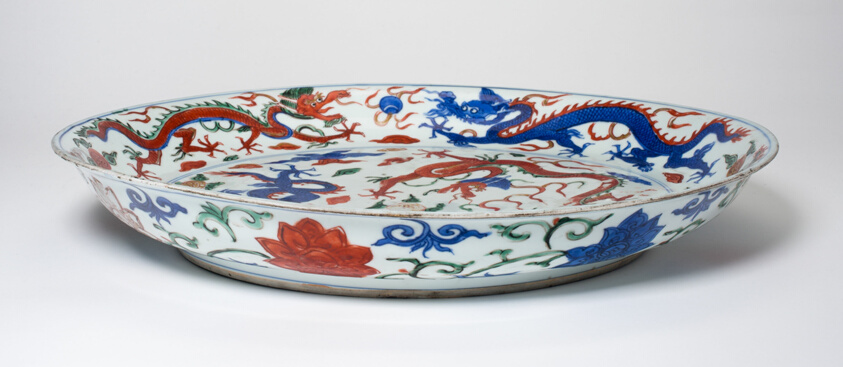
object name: Vessel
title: Dish with Dragons amid Clouds and Flaming Pearls; Vines and Lotus Flowers on Underside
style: Chinese (culture or style)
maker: China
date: Ming dynasty (1368–1644), Wanli reign mark and period (1563–1620)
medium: Porcelain painted in underglaze blue and overglaze enamels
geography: China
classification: dish (vessel); porcelain; ceramics; asian art; vessel